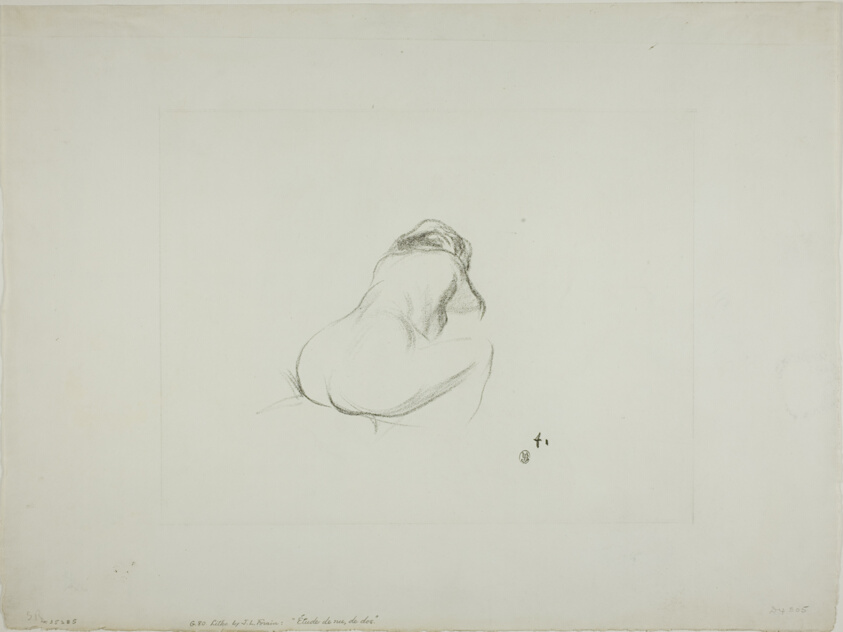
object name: Print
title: Study of a Nude Woman, from Behind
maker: Jean Louis Forain (French, 1852-1931)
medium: Lithograph on ivory wove paper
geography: France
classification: lithograph; print; prints and drawing